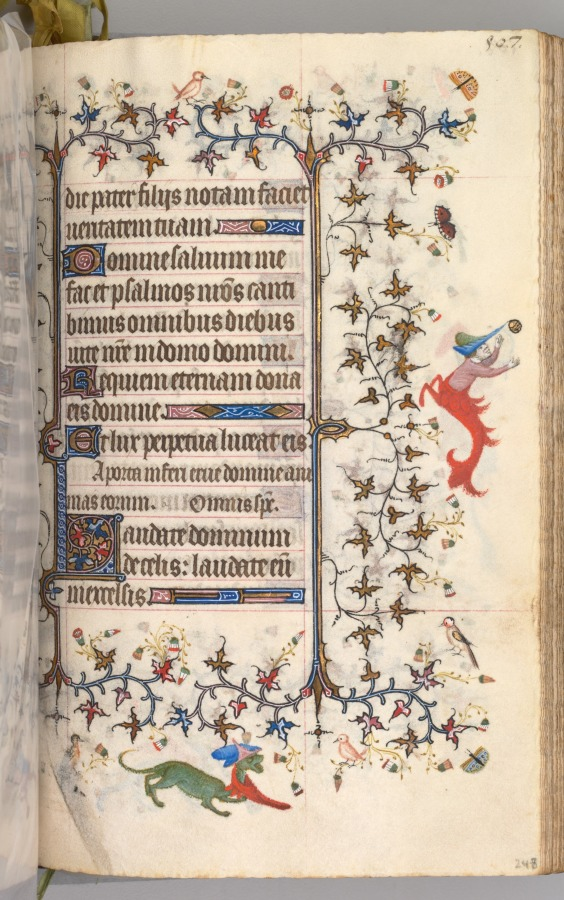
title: Hours of Charles the Noble, King of Navarre (1361-1425): fol. 248r, Text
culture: France, Paris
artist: Master of the Brussels Initials and Associates (French)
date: c. 1405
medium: ink, tempera, and gold on vellum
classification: Bound Volume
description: This precious volume was obviously highly prized by its owner, the French-born King of Navarre, who had his coat of arms painted on no less than twenty folios. Rather than directly commissioning this manuscript from a specific workshop, it seems that Charles the Noble acquired his book of hours -- perhaps ready-made for the luxury market -- while on a trip to Paris in 1404-05. A collaborative effort, six painting styles are evidenced within the pages of this codex, those of two Italians, two Frenchmen, and two Netherlanders. The painter who was responsible for the planning and decoration of the book, and who produced seventeen of the large miniatures, was a Bolognese artist known as the Master of the Brussels Initials. His principal assistant, responsible for most of the borders, was a Florentine who signed his name "Zecho" da Firenze on folio 208 verso.